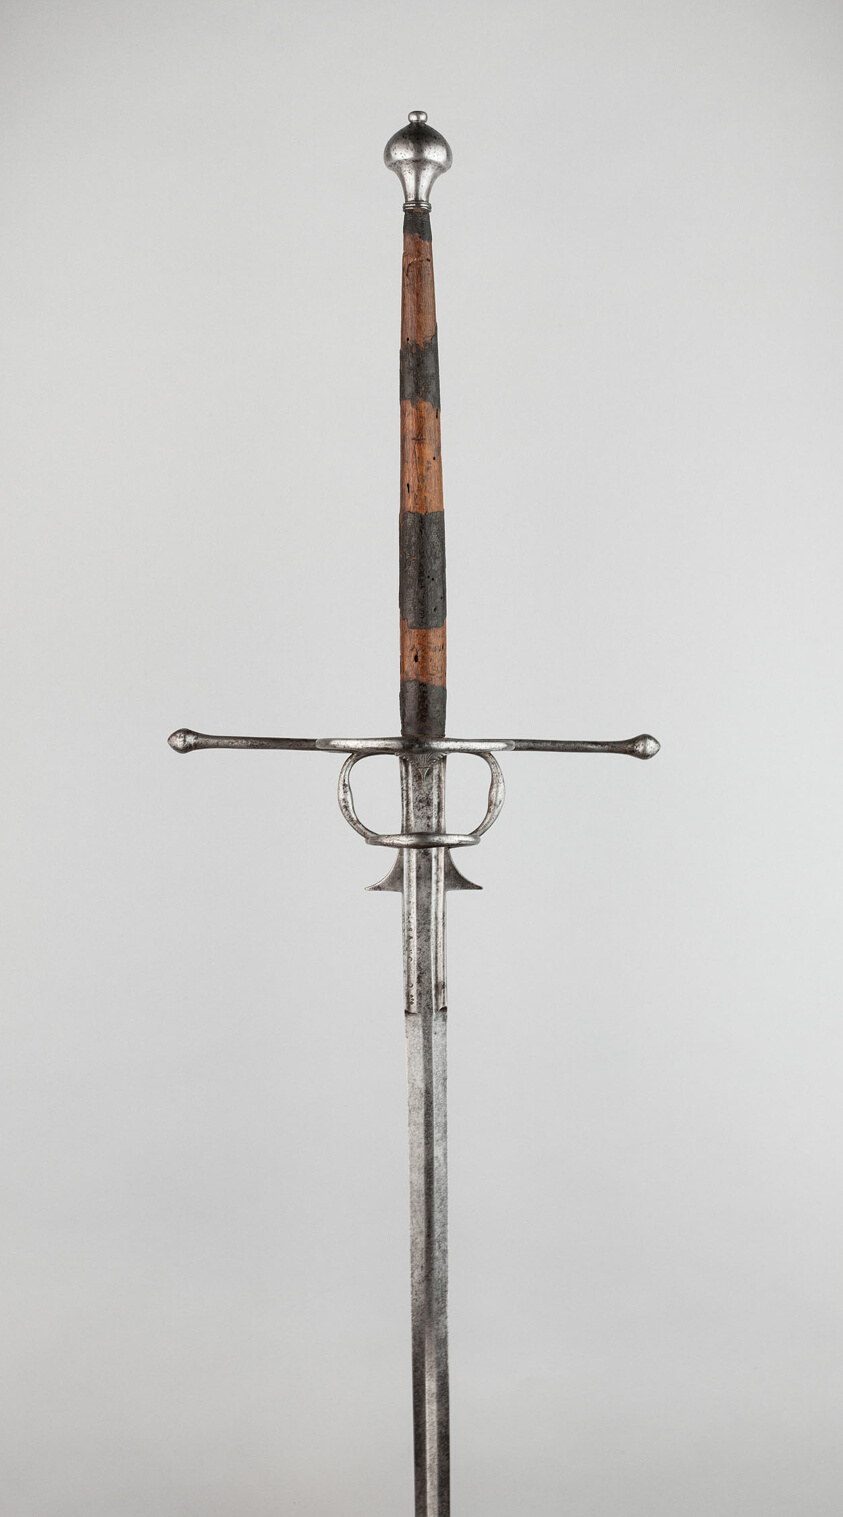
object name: Arms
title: Two-Handed Sword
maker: Probably German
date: c. 1600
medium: Steel, wood, and leather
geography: East Germany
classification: edged weapon-sword; arms; arms and armor